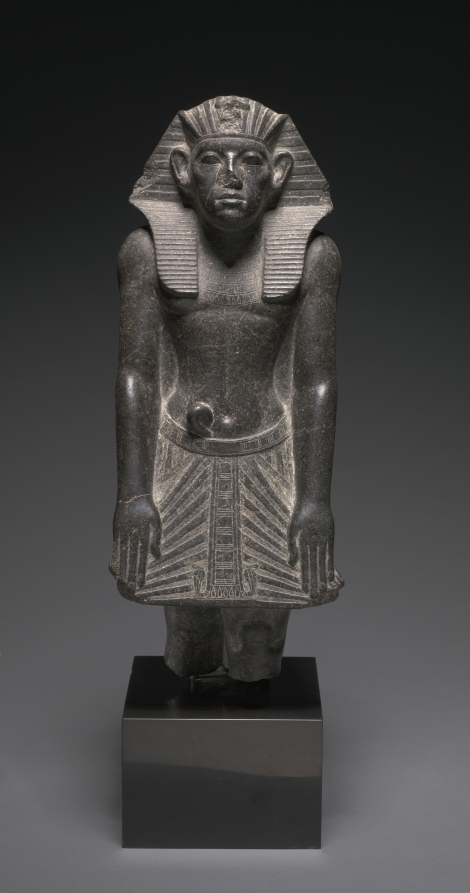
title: Statue of Amenemhat III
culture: Egypt, Middle Kingdom (2040–1648 BCE), Dynasty 12, reign of Amenemhat III (1860–1814 BCE)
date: c. 1859–1814 BCE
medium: granodiorite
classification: Sculpture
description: Even though this statue of a king is uninscribed, its distinctive features identify it without any doubt as a portrait of Amenemhat III. The heavy brows, prominent cheekbones, hollow cheeks, jutting lower jaw, and tightly bunched muscles at the corners of the mouth make a strikingly realistic impression. Not realistic, however, are the king’s supersized ears. Instead, they symbolize the ruler’s willingness to hear the prayers of his people. If this image had been carved in relief, the king’s hands would have been uplifted in worship. Here, however, to prevent the breakage of projecting limbs, the ruler’s hands are pressed flat against the front his kilt, a portion of which is looped over his belt.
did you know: The first pyramid Amenemhat III attempted to build, the so-called Black Pyramid, had major construction flaws and had to be abandoned when it started to collapse.